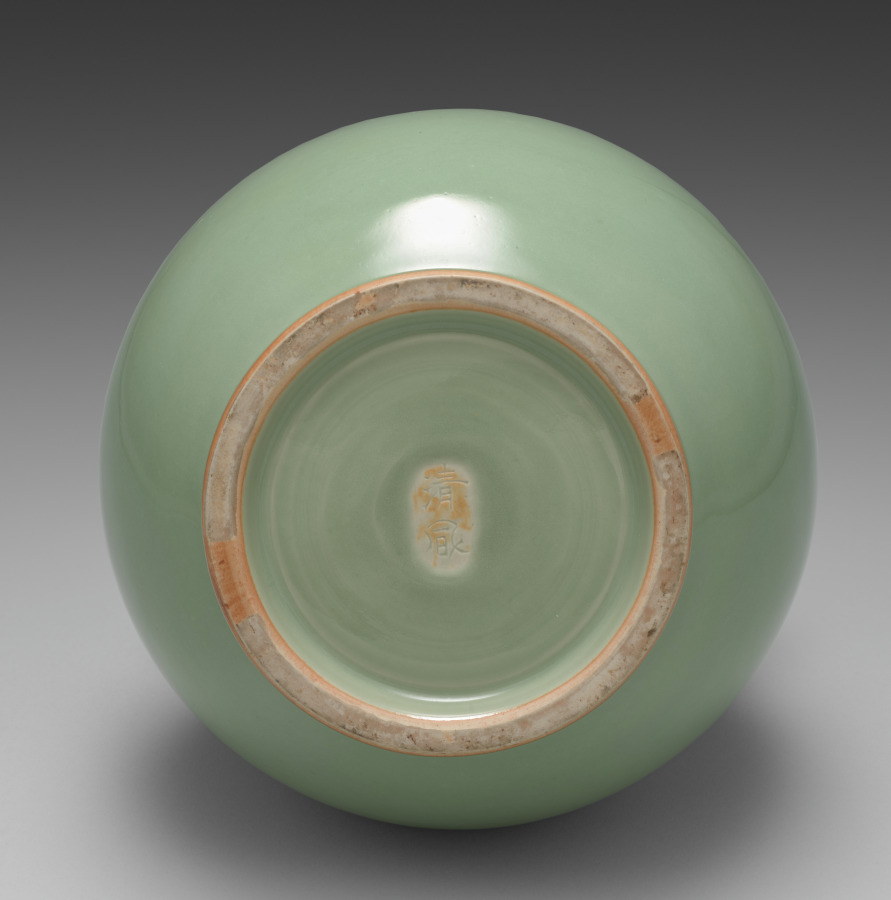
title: Hu-Shaped Vase with Handles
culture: Japan, Taishō period (1912–26) or Shōwa period (1926–89)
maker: Seifū Yohei IV (Japanese, 1872–1951)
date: 1914–46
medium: Porcelain with molded and carved design and green glaze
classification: Ceramic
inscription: 清風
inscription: 成山清風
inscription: 清風造【印】清風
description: Many of the vases created by Yohei III and IV were made with reference to and in emulation of Chinese ceramics in both form and glazing. The Seifu studio was inspired by later Chinese copies of two other archaic vessel types, the hu (Japanese ko) and guan (Japanese kan). In simple terms, in their original contexts, the hu and guan were storage jars that also appeared in ritual contexts. This hu-form vase by Yohei IV has a green glaze and handles in the shape of an elephant head. The details of the elephant heads are quite easy to miss, but a close look reveals that each has carved eyes with pupils defined, tiny ears and tusks in very low relief, and a curved trunk with the end curled up. This sort of container is even known as the “elephant ear” type. The only other decorative element on the vase’s pear-shaped body is a raised cordlike band around the shoulders.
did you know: The handles are shaped like elephant heads.